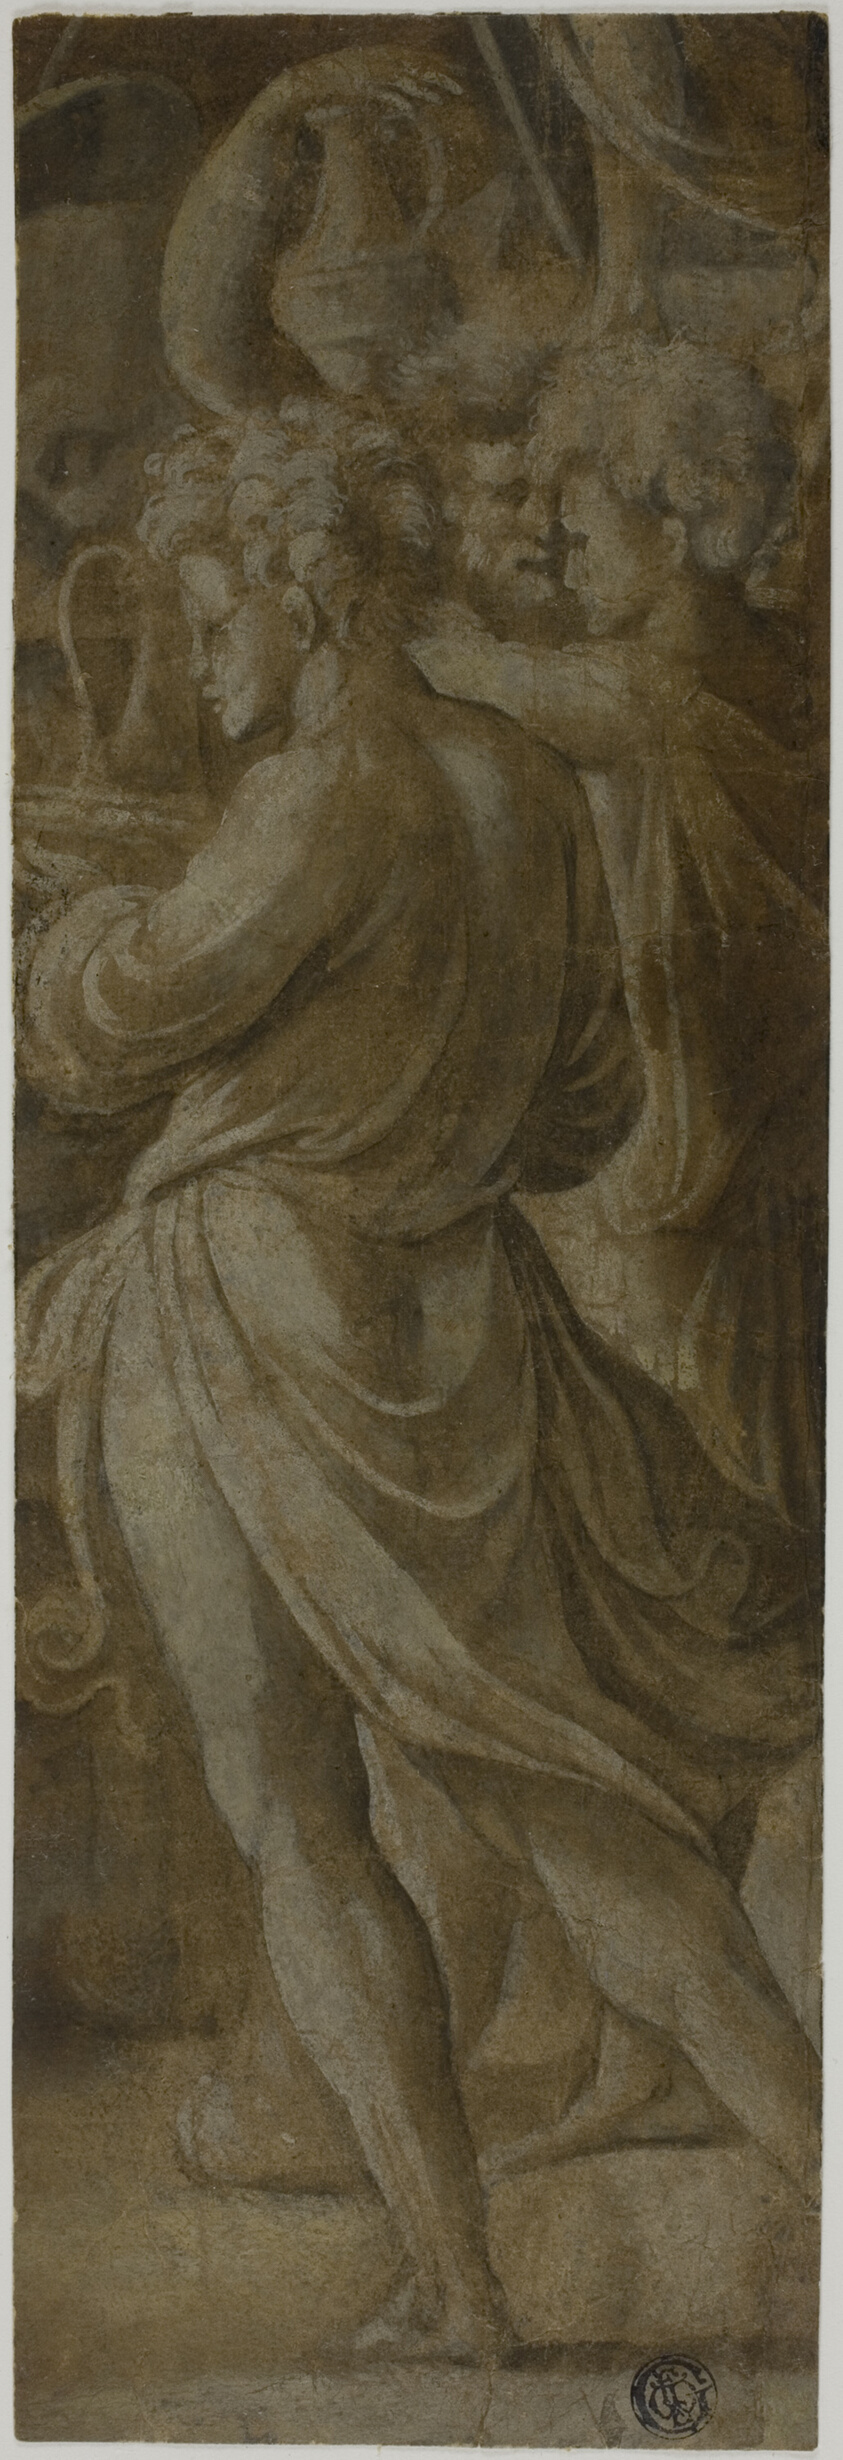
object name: Drawing and Watercolor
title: Fragment of a Composition: Attendants Bearing Flagons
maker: Attributed to Biagio Pupini, called dalle Lame (Italian, active 1511-1551); or Giulio Romano (Italian, 1499-1546)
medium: Brush and brown wash with gray oil paint, over black chalk, on cream laid paper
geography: Italy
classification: wash; drawings (visual works); prints and drawing